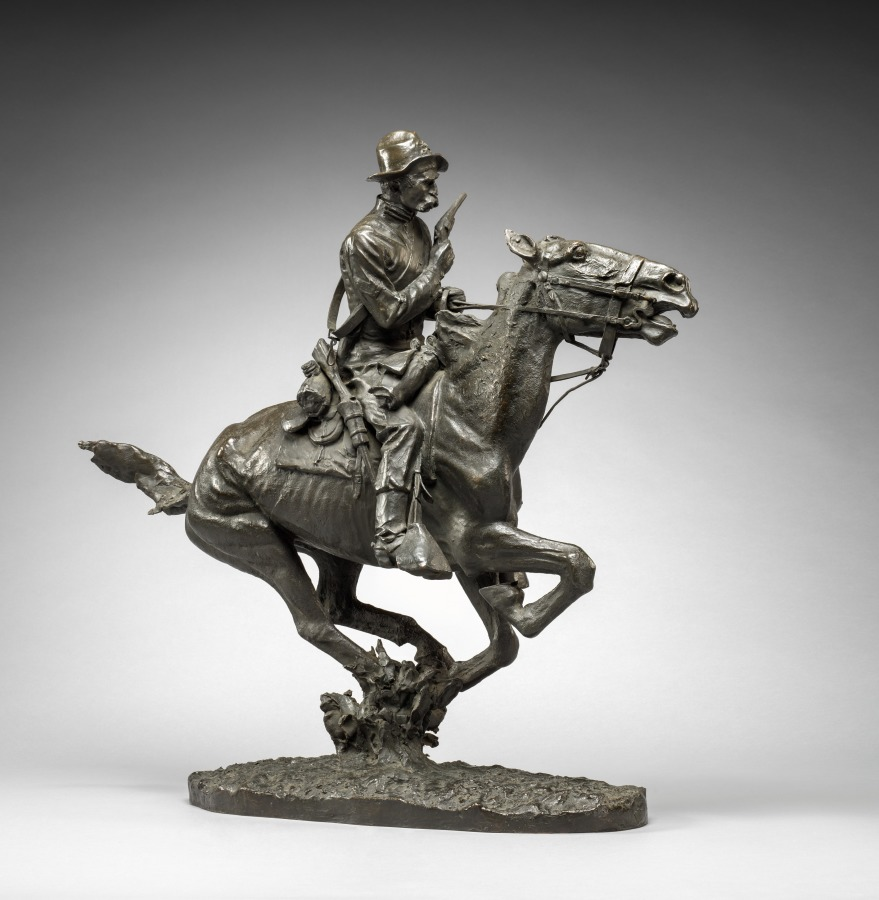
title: Trooper of the Plains-1868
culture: America, early 20th Century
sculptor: Frederic Remington (American, 1861–1909)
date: modeled 1908, cast c. 1911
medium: bronze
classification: Sculpture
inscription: Signed on top of base: Frederic Remington; Inscribed on side of base: Copyright by Frederick Remington, Roman Bronze Works, N.Y.; numbered underneath base: 3